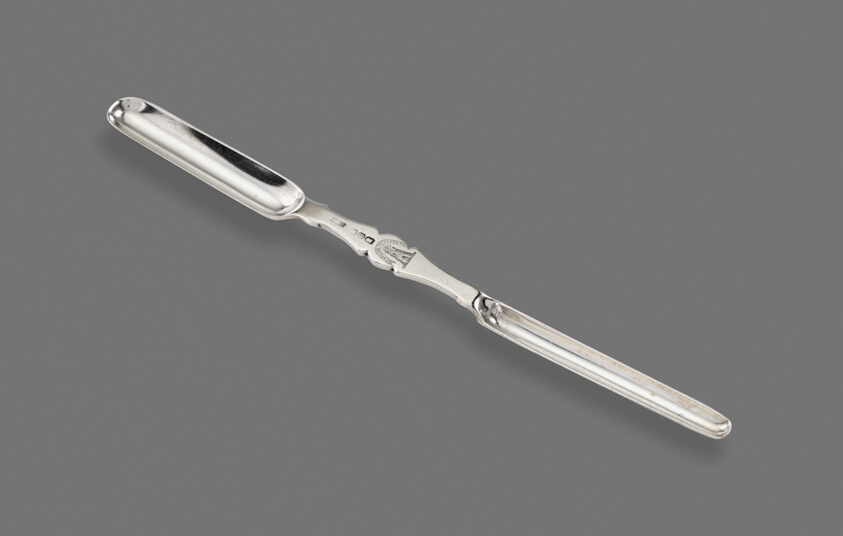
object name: Metalwork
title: Marrow Scoop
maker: Baldwin Gardiner; American, 1791–1869; New York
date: 1827–47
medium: Silver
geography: New York City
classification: utensil; silver; american decorative arts; american arts; decorative arts